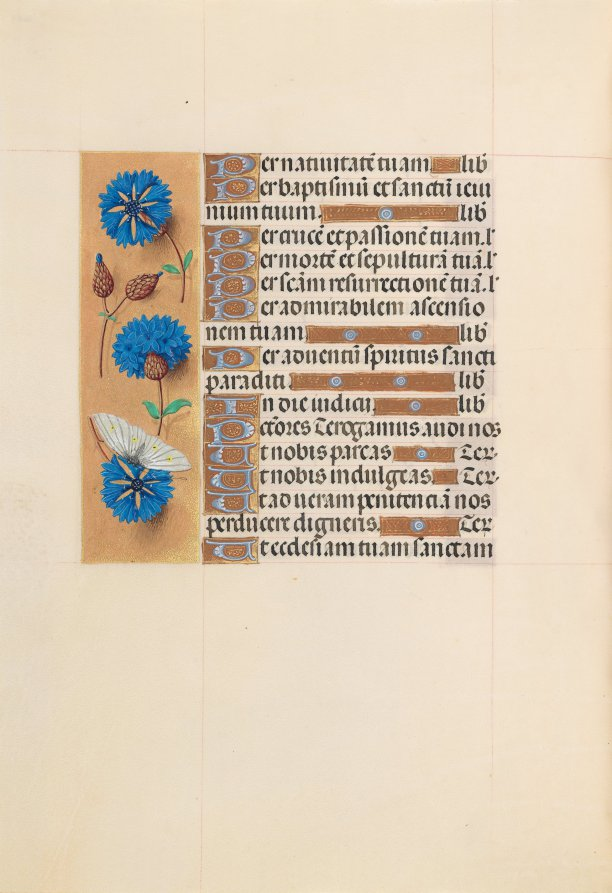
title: Hours of Queen Isabella the Catholic, Queen of Spain: Fol. 213v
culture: Flanders, Ghent and Bruges, late 15th century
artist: Master of the First Prayerbook of Maximillian (Flemish, c. 1444–1519)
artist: and Associates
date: c. 1500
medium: ink, tempera, and gold on vellum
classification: Bound Volume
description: This manuscript was illuminated by a circle of at least five highly organized manuscript painters active in the Flemish cities of Ghent and Bruges. The principal illuminator was Alexander Bening, who painted the majority of the book's miniatures. Manuscripts produced by this circle of artists are renowned for the decoration of their borders, which typically feature a rich variety of realistically-painted flowers, birds, and butterflies. This prayer book, called a book of hours, was intended not for a cleric, but for the private devotions of a lay person-in this case, Isabella the Catholic, Queen of Spain (1451-1504). Isabella's coat of arms embellishes the book's frontispiece. It is unlikely that the book was commissioned by the Queen herself; rather, she probably received it as a diplomatic gift from someone courting her patronage, perhaps Cardinal Francisco Jimenez de Cisneros. A Franciscan friar, Jimenez was dependent upon Isabella for his advancement, first to the post of Queen's confessor in 1492, and then to Archbishop of Toledo in 1495.